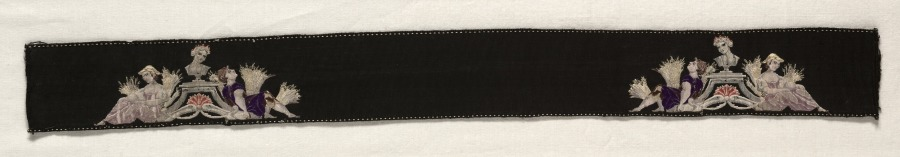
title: Ribbon: "Allegories of Harvest"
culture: England, early-mid-19th century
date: 1800 – 1850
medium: patterned tabby weave; silk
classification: Textile